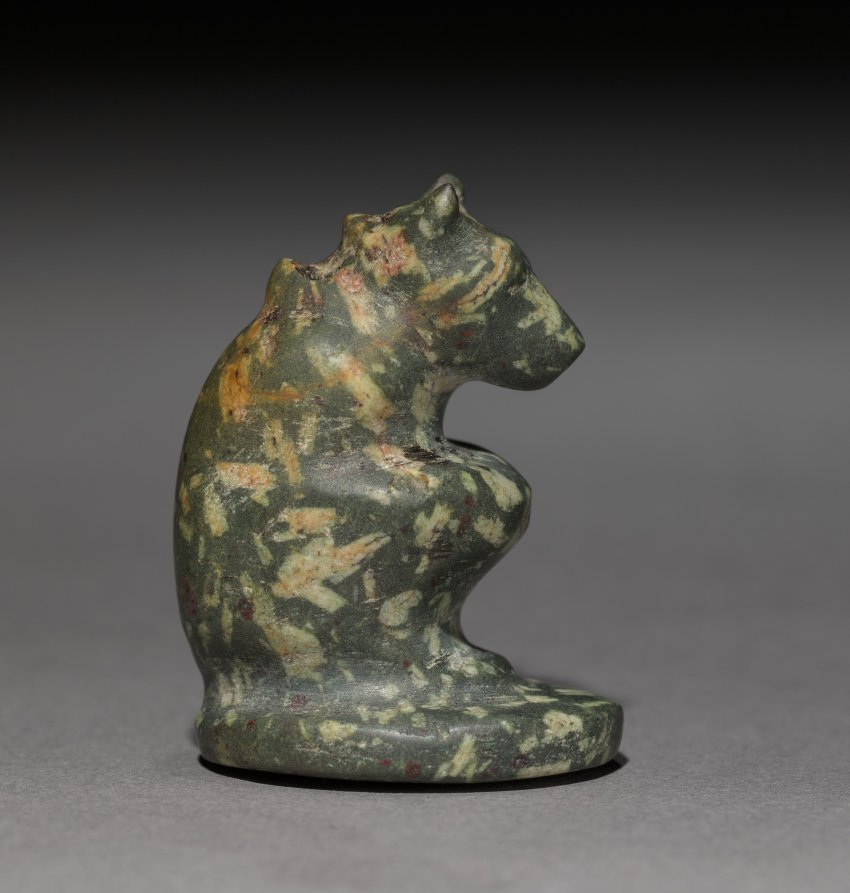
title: Amulet of a Crouching Bear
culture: Egypt, Late period (715–332 BCE)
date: 664–332 BCE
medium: green porphyry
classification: Amulets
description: For the Egyptians, the bear was an exotic species, and as early as 2400 BC it figures, though sporadically, in scenes of foreign tribute on tomb and temple walls. Representations of bears in the round are extremely rare. This bear, masterfully carved in hard greenish stone flecked with white, is a little gem. The animal rests on its haunches on a circular base, head bent forward, legs drawn up in a posture not unlike that of the classic pose for Egyptian gods. Sensitivity to such delightful details as the animal's perked-,up ears, tiny face, and wrinkled neck make this tiny giant a rare prize.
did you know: The bear is not native to Egypt, although until the beginning of this century it survived in Lebanon.